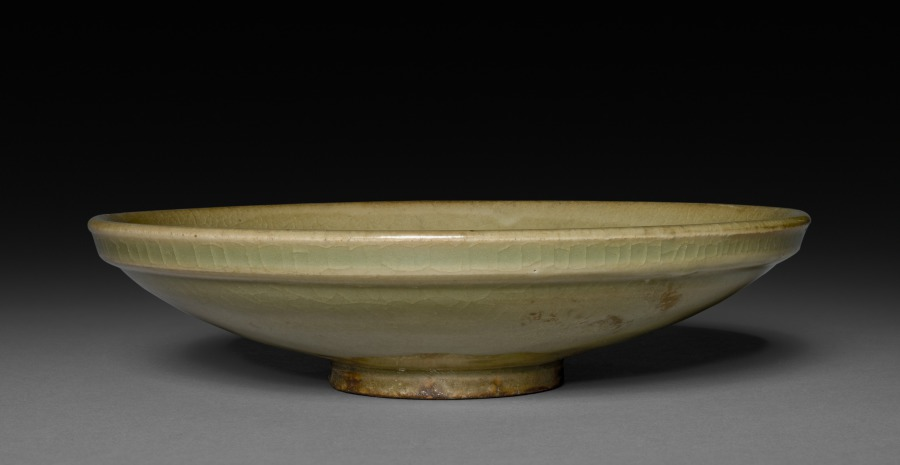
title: Saucer: Northern Celadon Ware, Yaozhou type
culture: China, late Northern Song dynasty (960-1127) - Jin dynasty (1115-1234)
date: 1100s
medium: glazed stoneware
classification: Ceramic